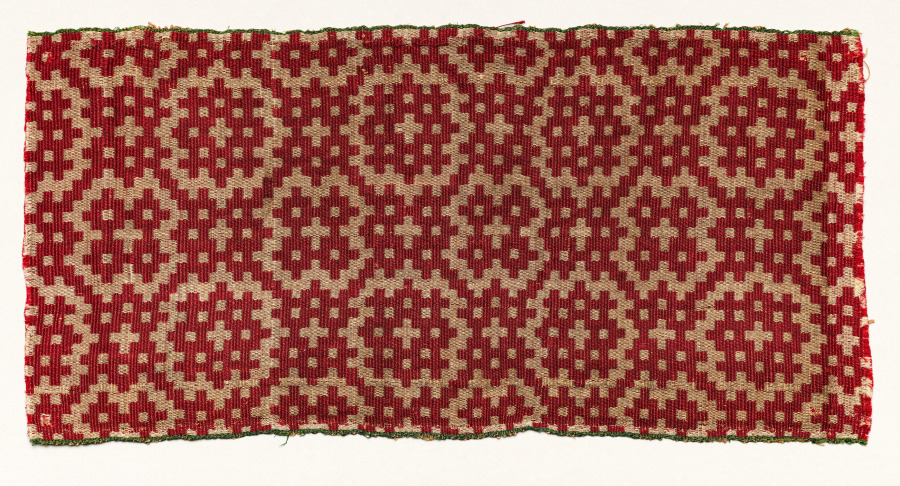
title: Fragment of a furnishing textile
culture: Africa, North Africa, Morocco, Moroccan weaver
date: 1800s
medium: Silk, dye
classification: Textile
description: This textile fragment is woven using one silk warp (vertical thread) and multiple silk wefts (horizontal threads), creating a red and white pattern. The fragment was likely once part of a furnishing textile, perhaps used to cover a pillow or other household object.